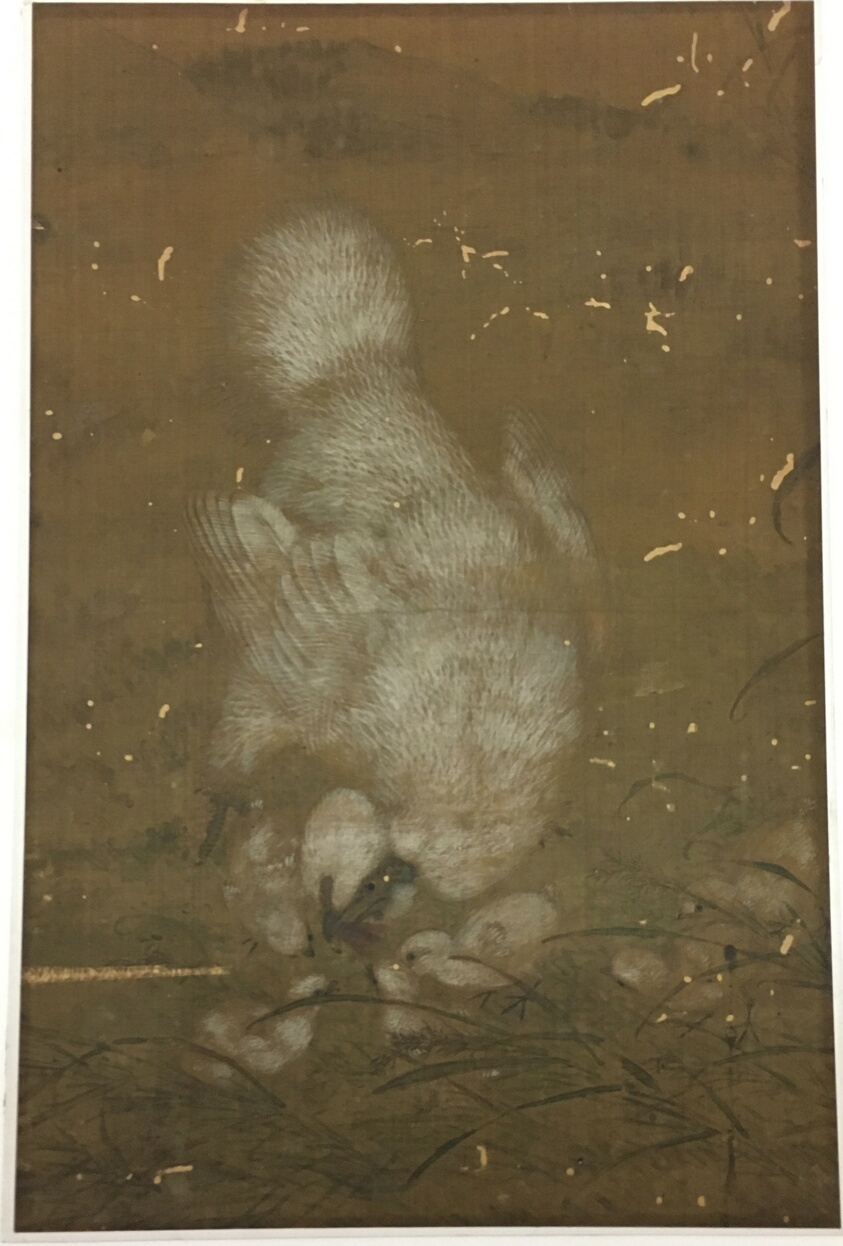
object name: Painting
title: White Hen and Chicks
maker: Artist unknown; Chinese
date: Ming dynasty (1368–1644)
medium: Framed; ink and light color on silk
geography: China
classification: album leaf; painting; asian art